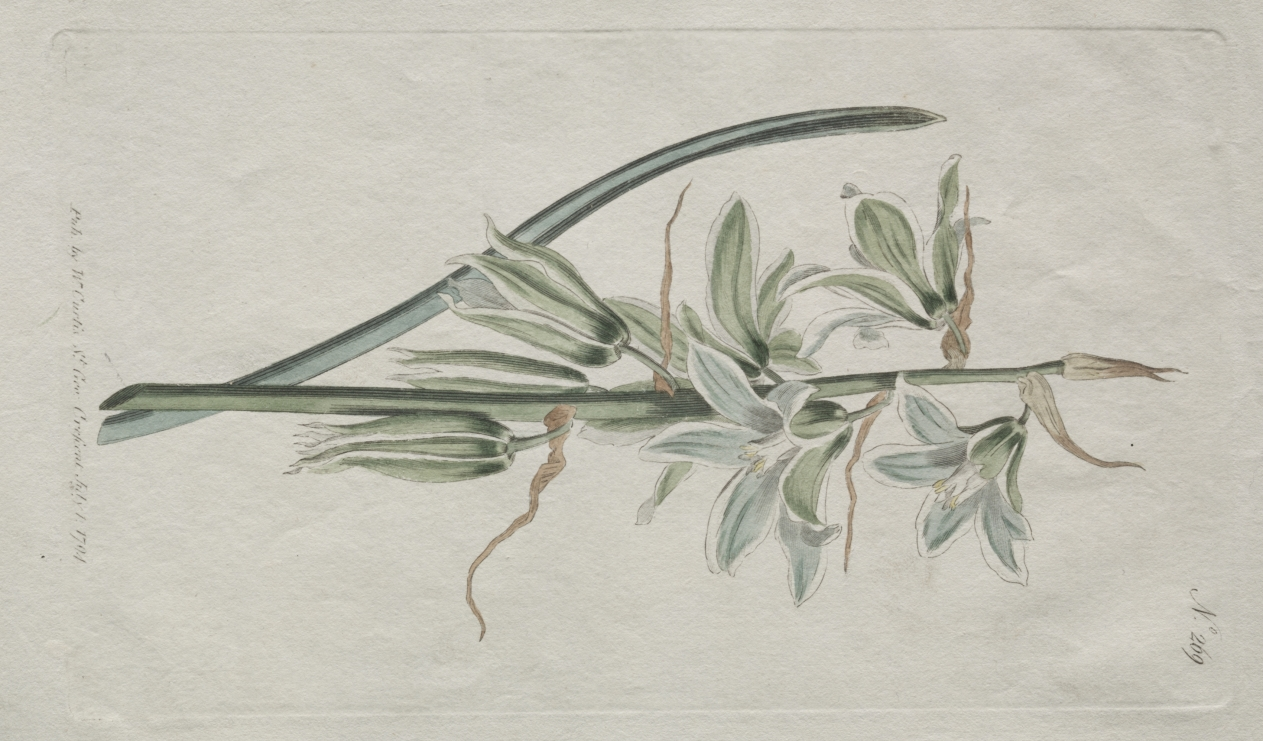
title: The Botanical Magazine or Flower Garden Displayed: Star of Bethlehem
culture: England, 18th century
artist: William Curtis (British, 1746–1799)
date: 1794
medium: engraving, hand-colored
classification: Print